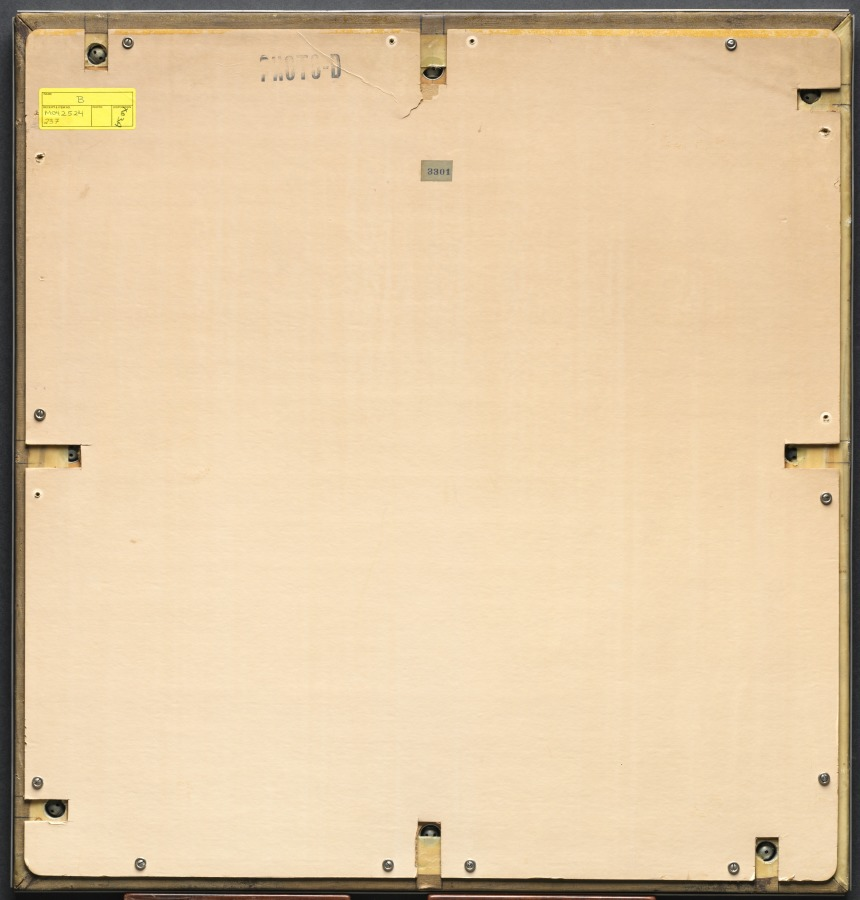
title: On the River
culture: France, late 19th-early 20th century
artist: attributed to Henri-Edmond Cross (French, 1856–1910)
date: c. 1900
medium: oil on canvas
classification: Painting